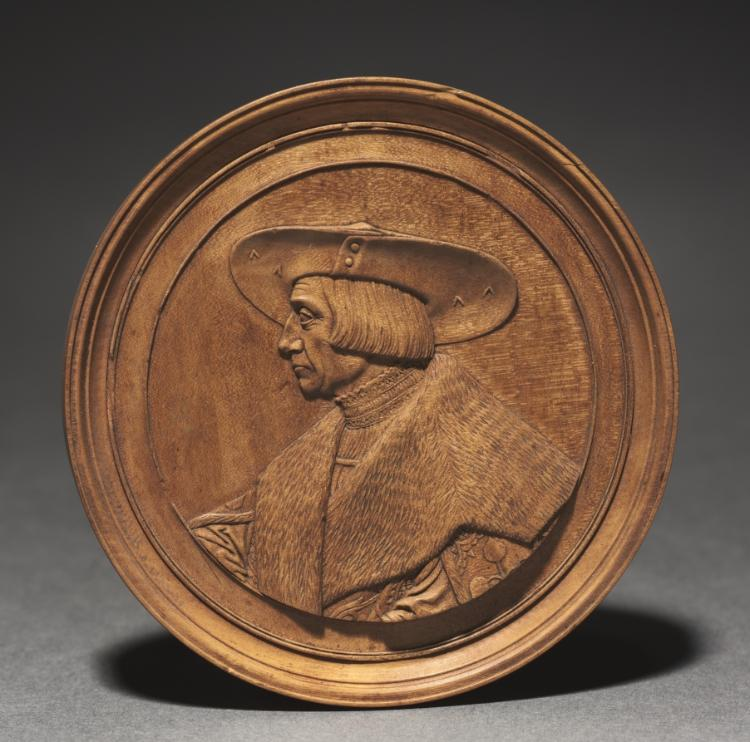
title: Portrait of a Man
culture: Germany, early 16th century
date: early 1500s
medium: boxwood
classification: Sculpture